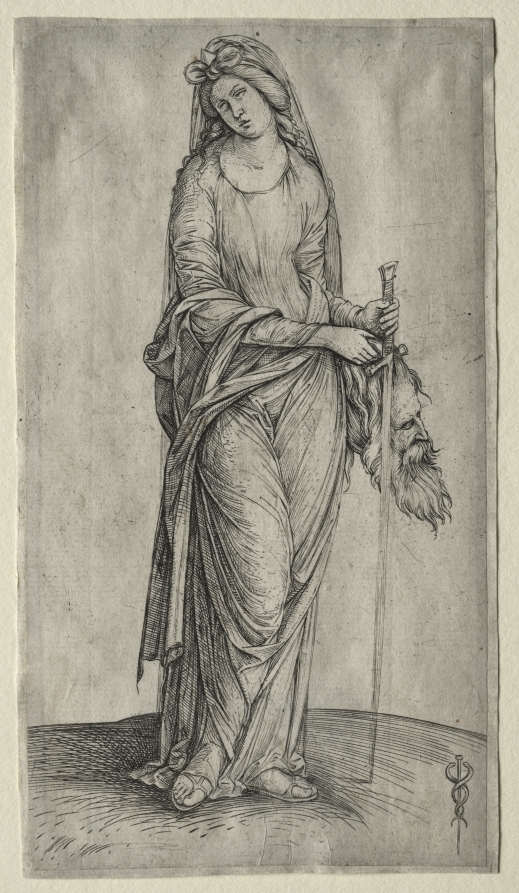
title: Judith Holding the Head of Holofernes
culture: Italy, 15th-16th century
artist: Jacopo de' Barbari (Italian, c. 1460/70–c. 1516)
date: c. 1501–1503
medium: engraving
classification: Print